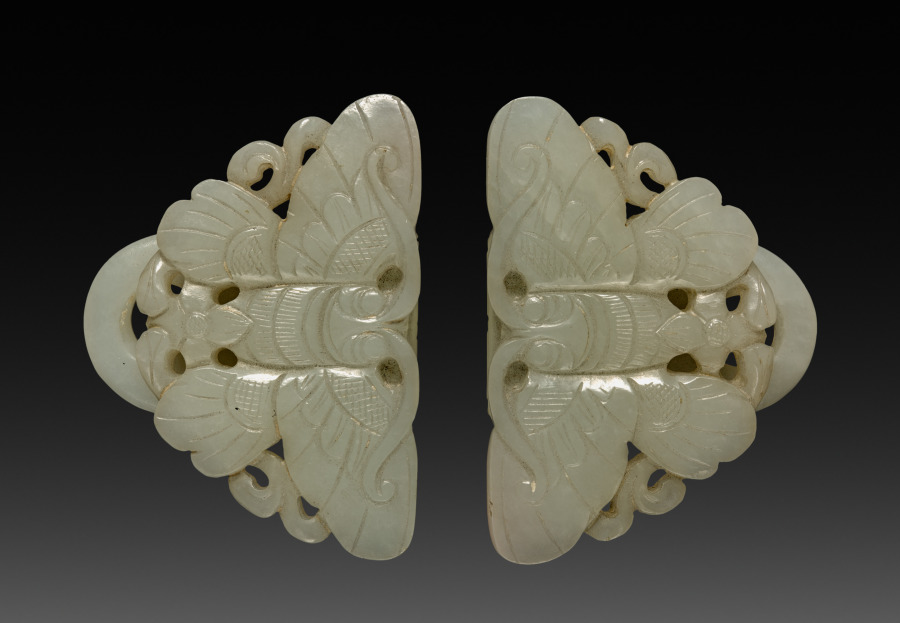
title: Butterfly Buckle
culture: China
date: 1800s–1900s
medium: white jade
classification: Jewelry